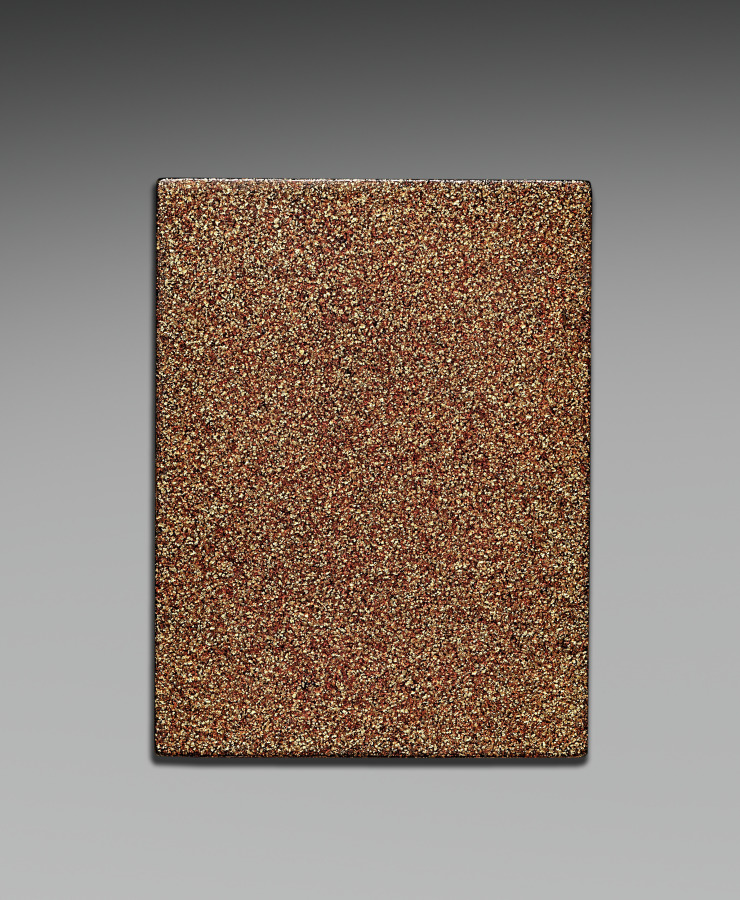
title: Nested Boxes with Chrysanthemums (inner box)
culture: Japan, Meiji period (1868–1912)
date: early 1900s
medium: lacquer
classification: Lacquer